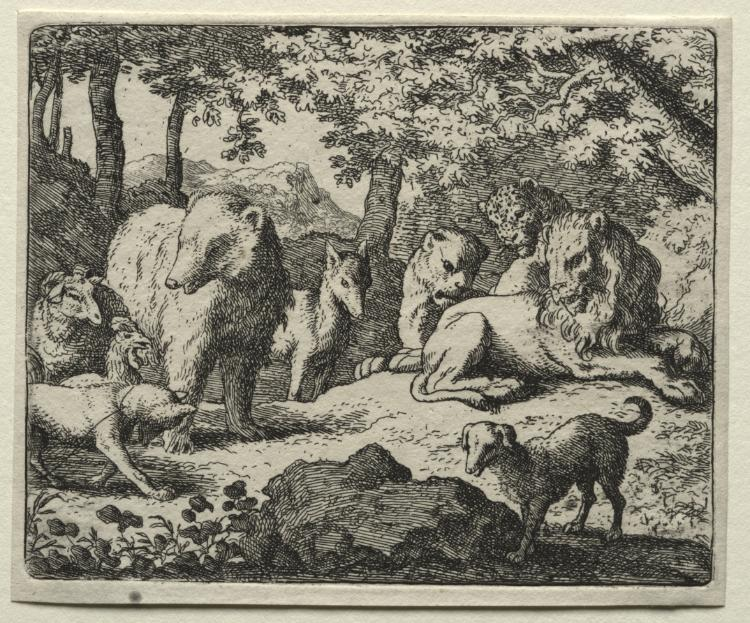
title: Reynard the Fox: The Suspension of the Sentence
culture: Netherlands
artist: Allart van Everdingen (Dutch, 1621–1675)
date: 1650–75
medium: etching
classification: Print